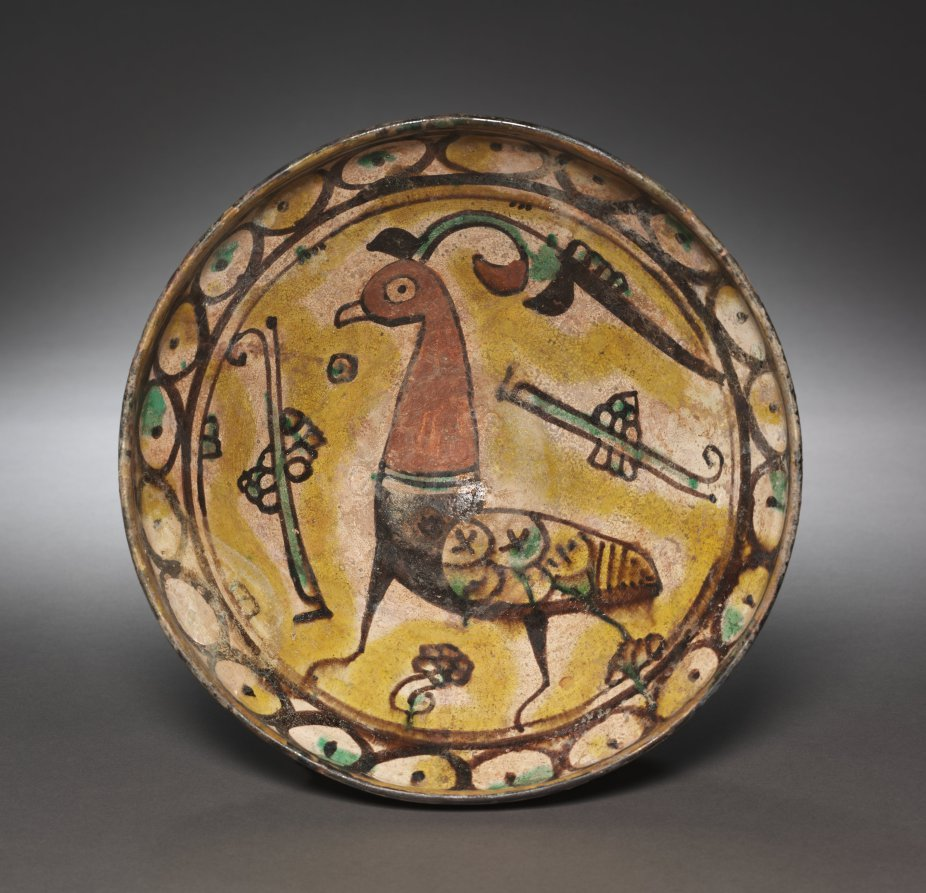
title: Bowl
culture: Iran, Nishapur, Samanid Period, 10th Century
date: 900s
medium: earthenware with underglaze slip-painted decoration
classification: Ceramic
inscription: Two horizontal ornamental motifs at center may be derived from Arabic baraka (blessing), written retrograde.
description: The red earthenware body of this bowl is covered with buff slip, excluding the foot ring. A stylized bird, ornamental motifs, and border designs were done in purplish-brown, red, green, and yellow under a colorless clear glaze.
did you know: The spiral marks on the bowl's exterior and the symmetry indicate that it was shaped by throwing clay on a wheel.